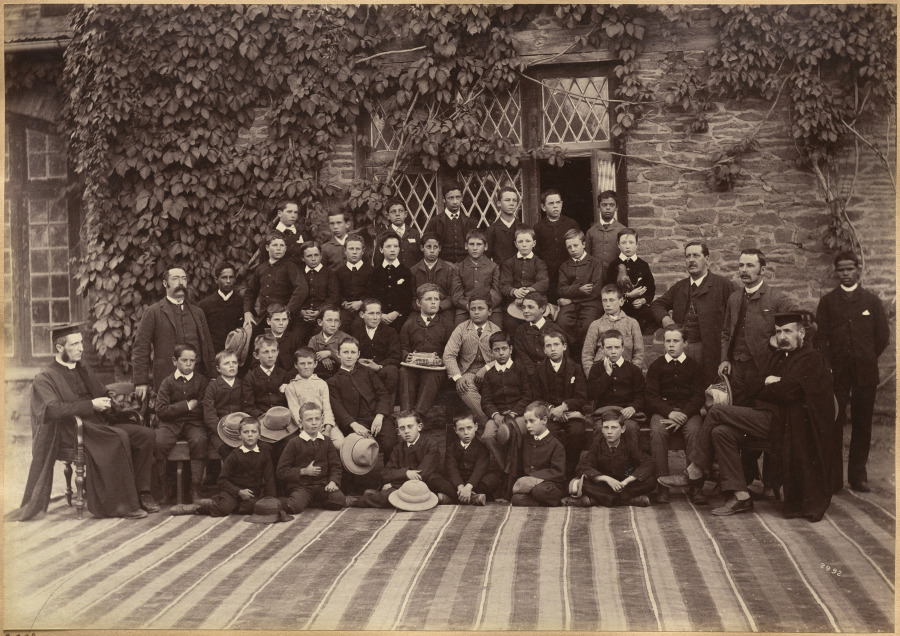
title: Primary Class, Bishop Cotton School, Shimla (recto)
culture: India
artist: Raja Deen Dayal (Indian, 1844–1905)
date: c. 1882–87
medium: albumen print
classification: Photograph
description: These photographs are part of an album, now disassembled, of around 105 photographs taken in India between 1885 and summer 1887 that provide glimpses into the lives of the British colonial elite and royal and upper-class Indians. The museum holds another group of 37 pictures from this album (2016.266), which was probably commissioned by a British civil servant visiting or working in India around 1888 as a personal souvenir of his experiences there.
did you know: Raja Deen Dayal is regarded now, and was considered during his lifetime, to be India’s most important 19th-century photographer.